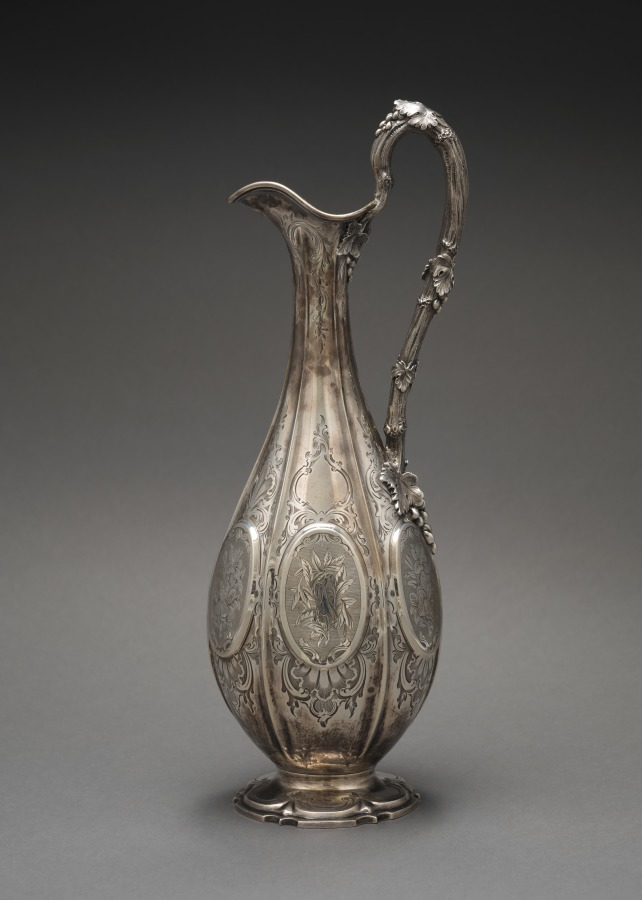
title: Pitcher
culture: England, 19th century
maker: Edward Barnard & Sons (British, c. 1680–2003)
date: c. 1870–80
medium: silver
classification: Silver